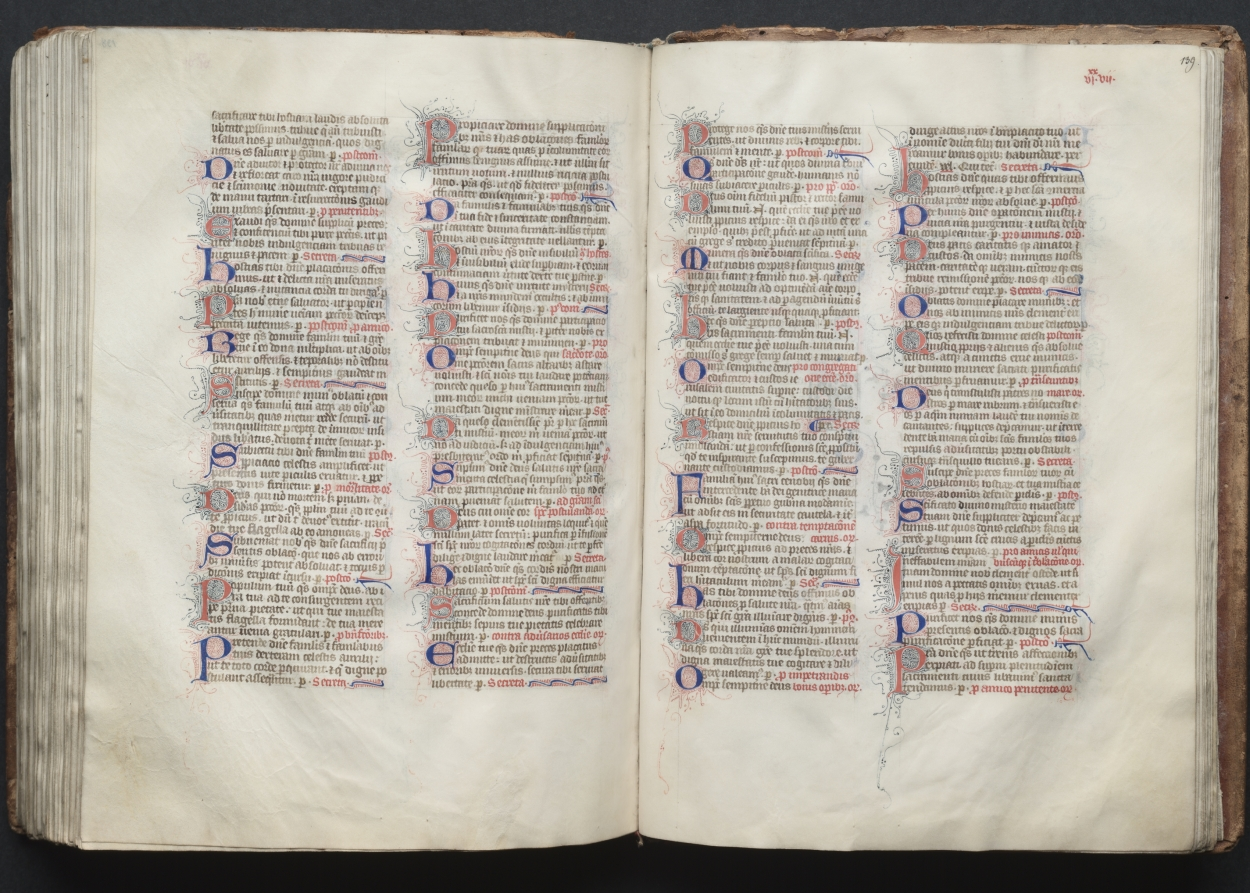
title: The Gotha Missal: Fol. 138v, Text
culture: France, Paris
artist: Master of the Boqueteaux (French)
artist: and Workshop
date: c. 1375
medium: ink, tempera, and gold on vellum; blind-tooled leather binding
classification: Bound Volume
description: The style and quality of this manuscript's decoration is typical of deluxe Parisian books made for aristocratic or royal patrons. Most of the book's decoration appears to be the work of the Master of the Boqueteaux, an artist active at the court of King Charles V (died 1380). His style was apparently shared by a number of book illuminators working in and around Paris. It is very possible that the Gotha Missal belonged to Charles V, but is not provable because the manuscript has no royal portraits and lacks a colophon. Given the book's magnificent decoration, however, it would seem that it was produced for a Valois prince, if not for the king himself. The manuscript receives its name from the German dukes of Gotha, its later owners.